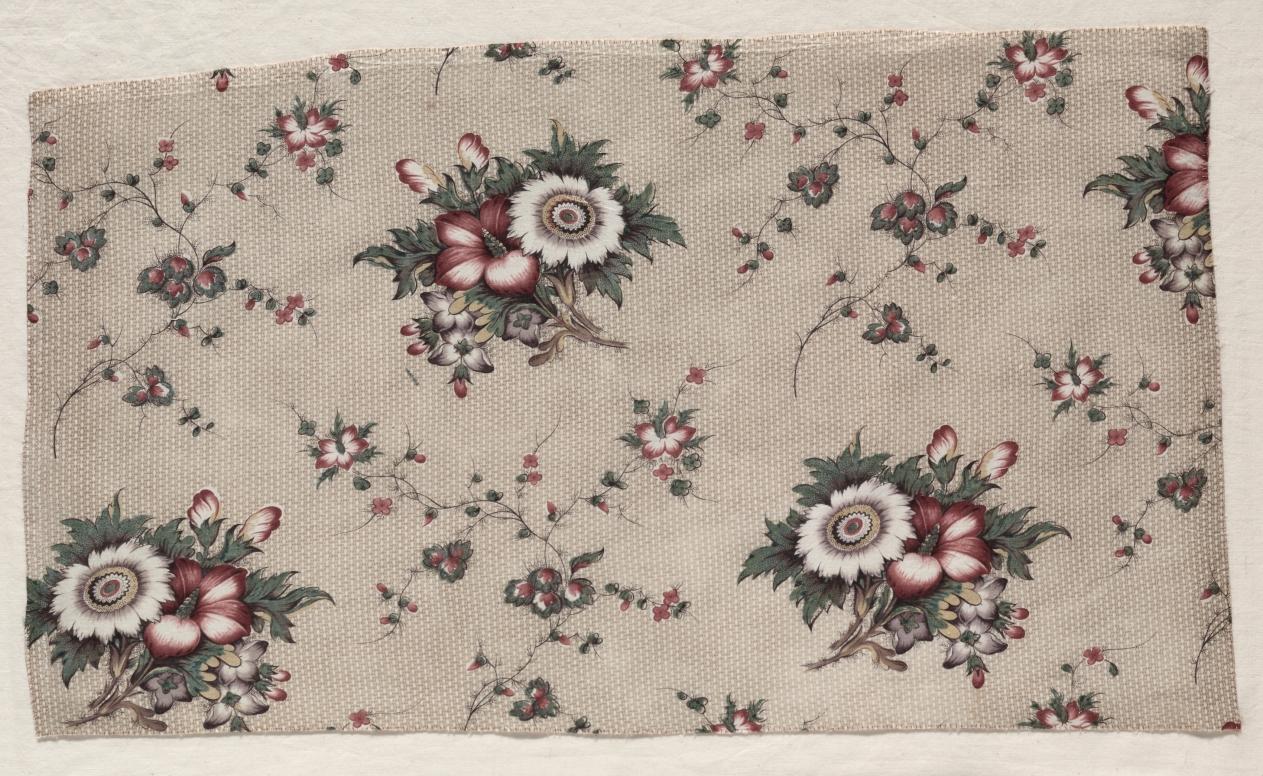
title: Glazed Chintz Fragment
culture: England, 19th century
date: c. 1830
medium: machine and block printed cotton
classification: Textile